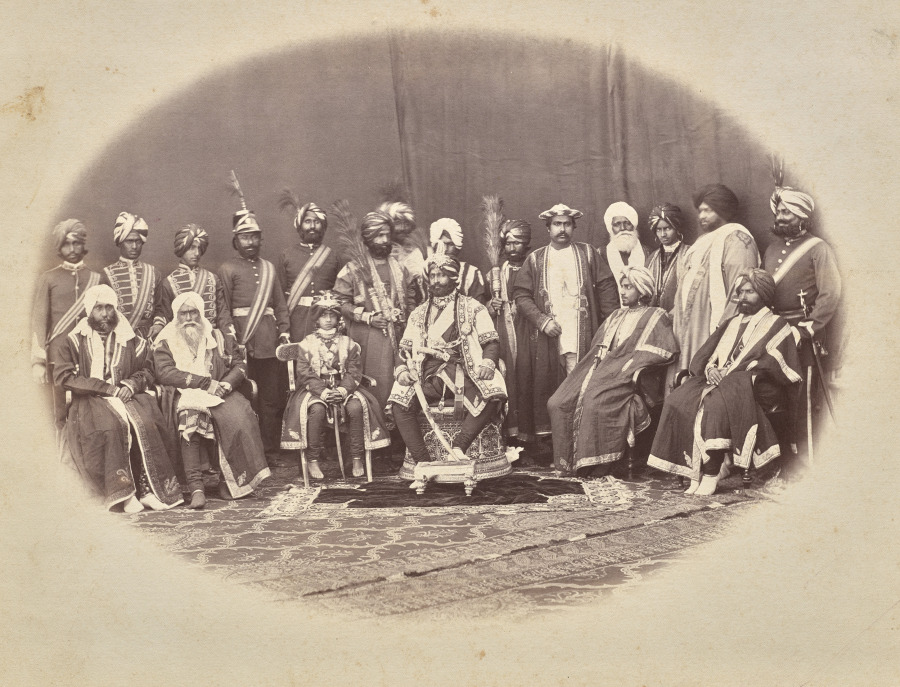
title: Maharaja Ranbir Singh of Jammu and Kashmir with Sons and Courtiers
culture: Northern India, Pahari kingdoms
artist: Bourne & Shepherd (British, active India, 1868–2016)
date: 1870s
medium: albumen print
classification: Photograph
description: Ranbir Singha (1830-1885) was a Pahari raja and son of the founder of the Jammu and Kashmir state, which he ruled for almost 30 years. He established a modern judicial code and a silk factory in his state and was a scholar of the Sanskrit and Persian languages. One of his four sons—it is not known which one—sits beside him for this portrait.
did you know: Anchoring the center of this oval composition is the maharaja, resplendent in richly embroidered robes and jewels and wearing a sword and a dagger.